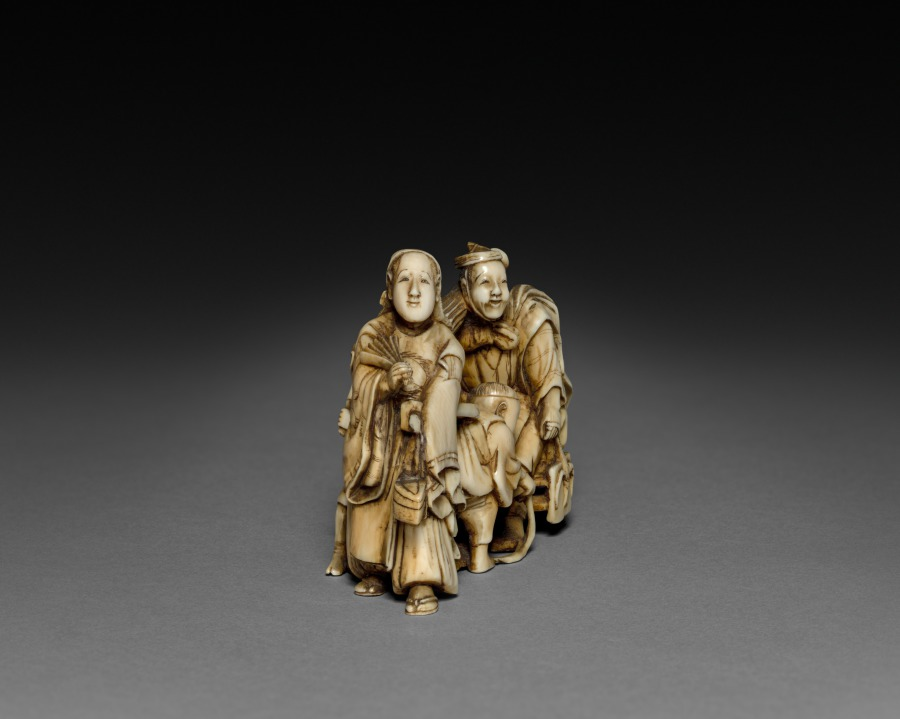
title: Procession with Four Figures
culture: Japan, Meiji period (1868–1912)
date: Late 1800s- Early 1900s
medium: ivory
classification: Ivory